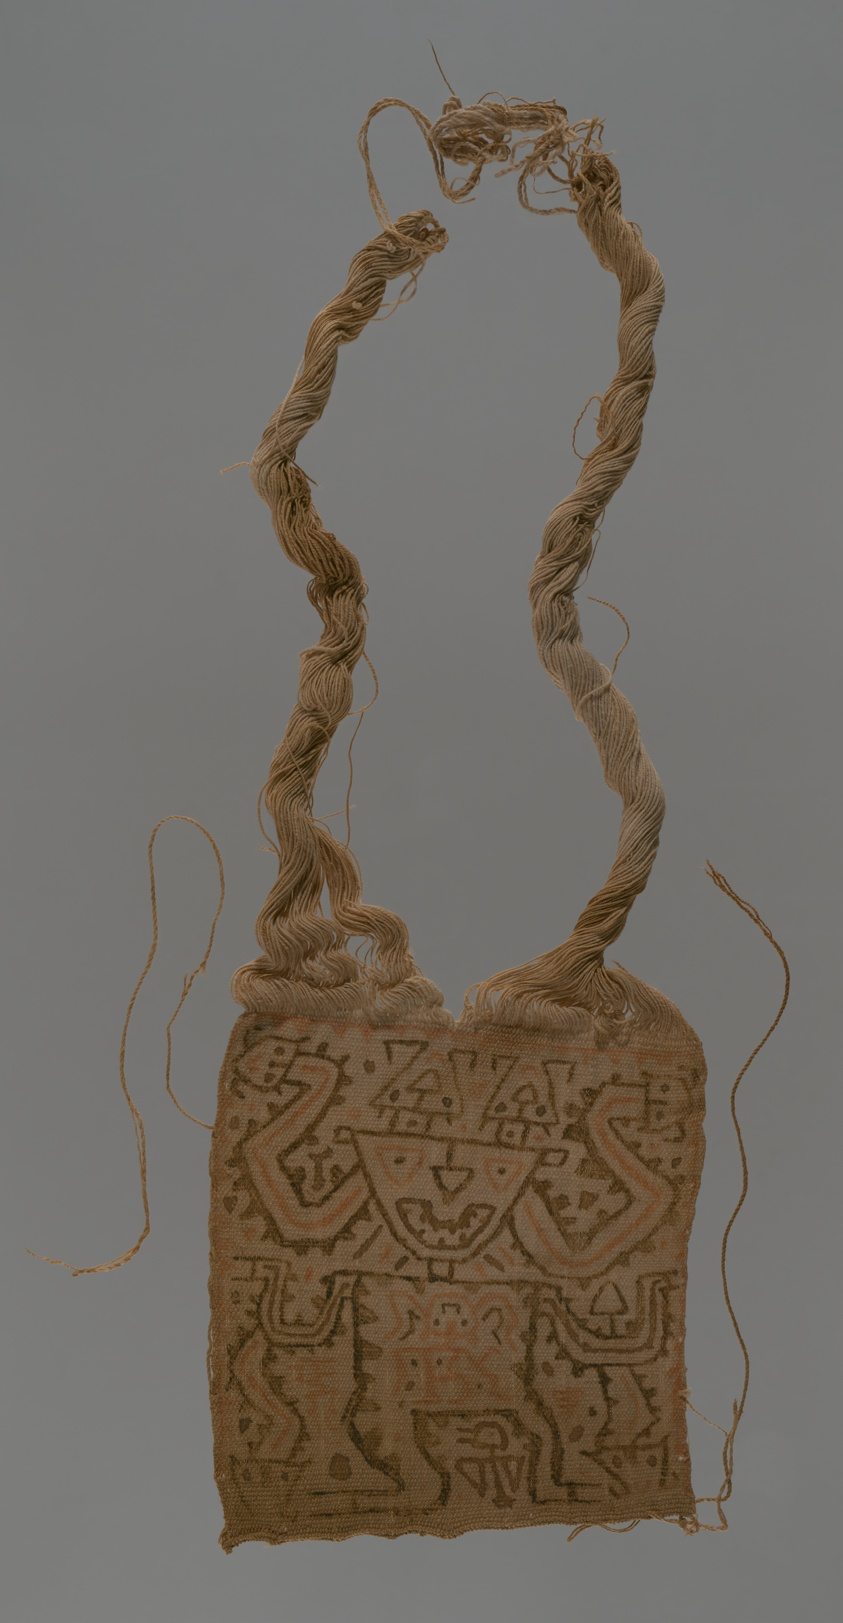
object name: Textile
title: Mummy Mask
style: ocucaje, paracas, early horizon, Pre-Columbian, peruvian, andean, andes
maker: Paracas (South coast, Peru)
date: 100/1 B.C.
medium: Cotton, plain weave with bundles of extended warps; painted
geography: Peru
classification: textile; weaving - printed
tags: super/natural